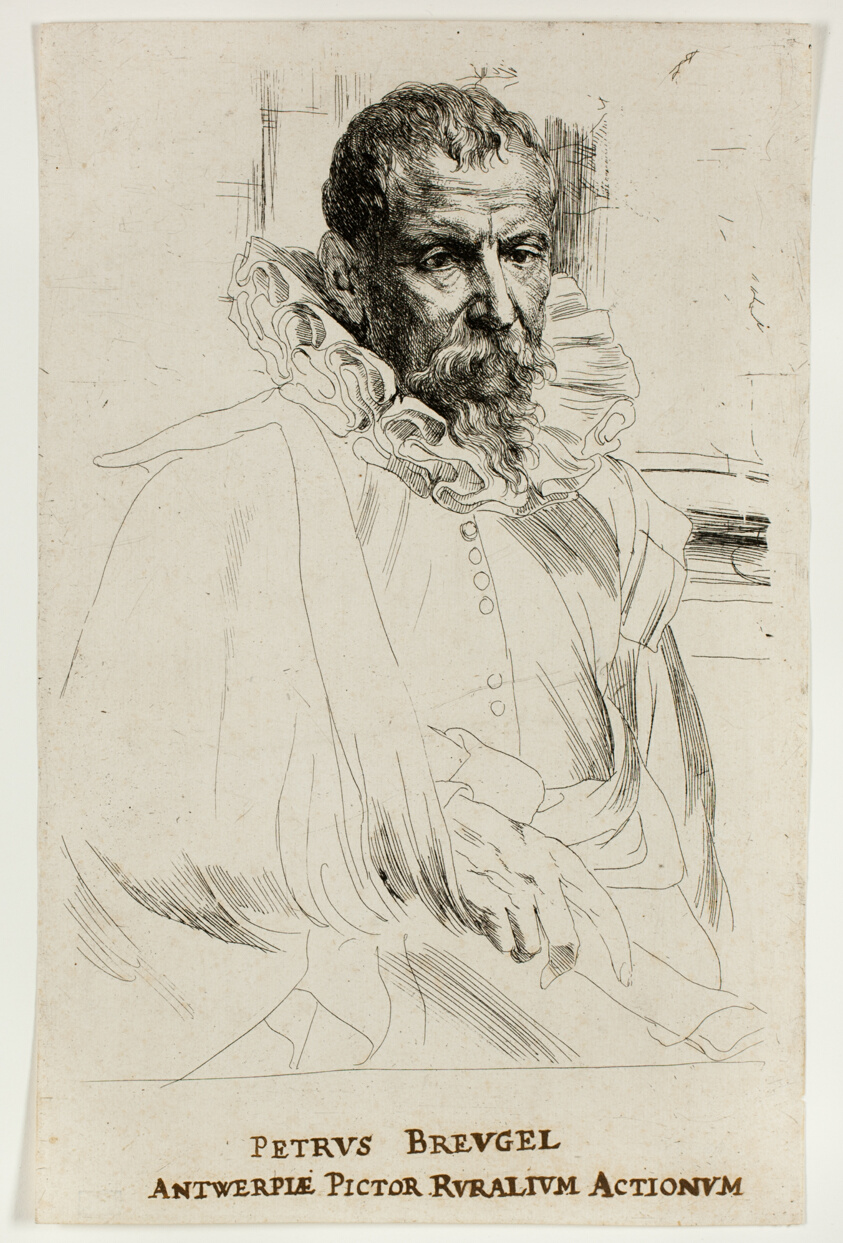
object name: Print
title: Pieter Brueghel the Younger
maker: Anthony van Dyck (Flemish, 1599-1641)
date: 1630/33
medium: Etching in black, with pen and brown ink, on ivory laid paper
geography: Flanders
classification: etching; print; prints and drawing